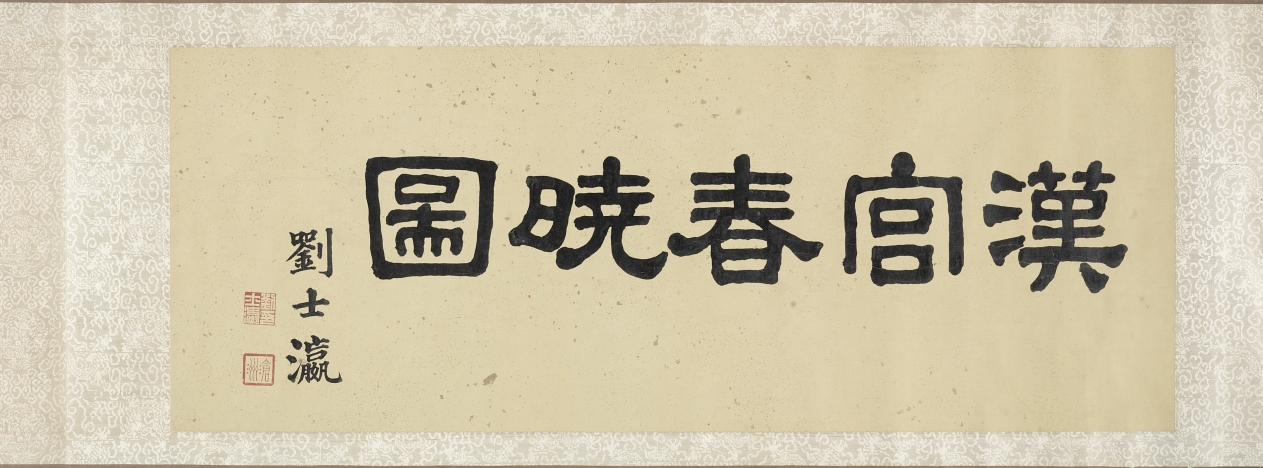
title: Palace Ladies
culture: China, Qing dynasty (1644-1911)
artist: copy after Qiu Ying (Chinese, 1494–1552)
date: 1644–1911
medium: handscroll, ink and color on silk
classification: Painting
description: This handscroll illustrates the pursuits of court ladies in a palace precinct on a spring day. Women, young girls, and their maids amuse themselves by sitting on a swing, playing games, watering and admiring peonies, performing music together, playing the qin (zither), feeding a parrot on the balustrade and fish in the water, or catching butterflies. The life of elite women was mostly restricted to the so-called inner quarters, meaning the garden and inner courts of the house. This painting idealizes the world of young palace girls that in fact was often filled with boredom and waiting for a lover.